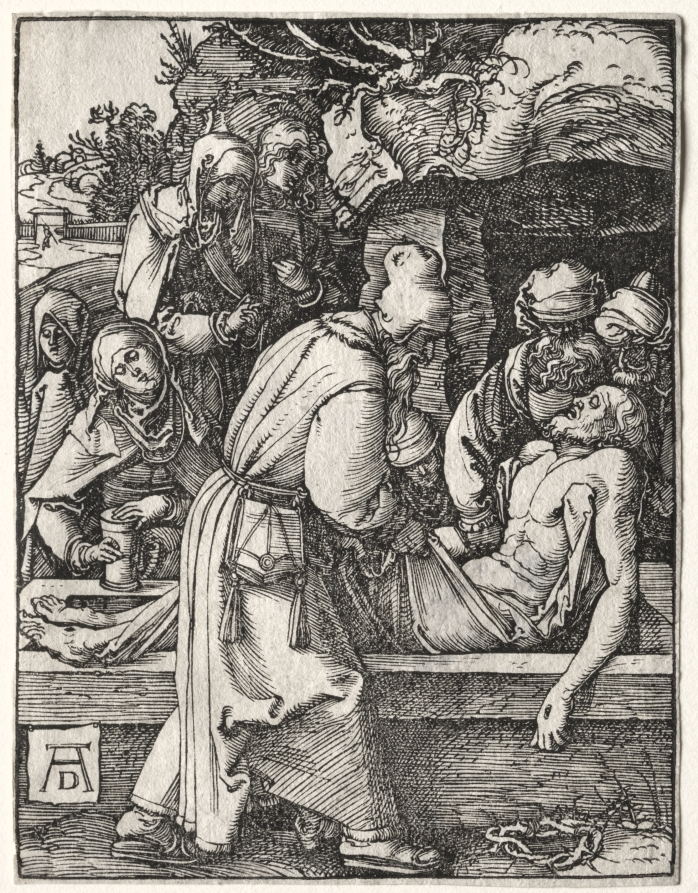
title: Small Passion: The Deposition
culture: Germany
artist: Albrecht Dürer (German, 1471–1528)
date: c. 1509–10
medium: woodcut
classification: Print